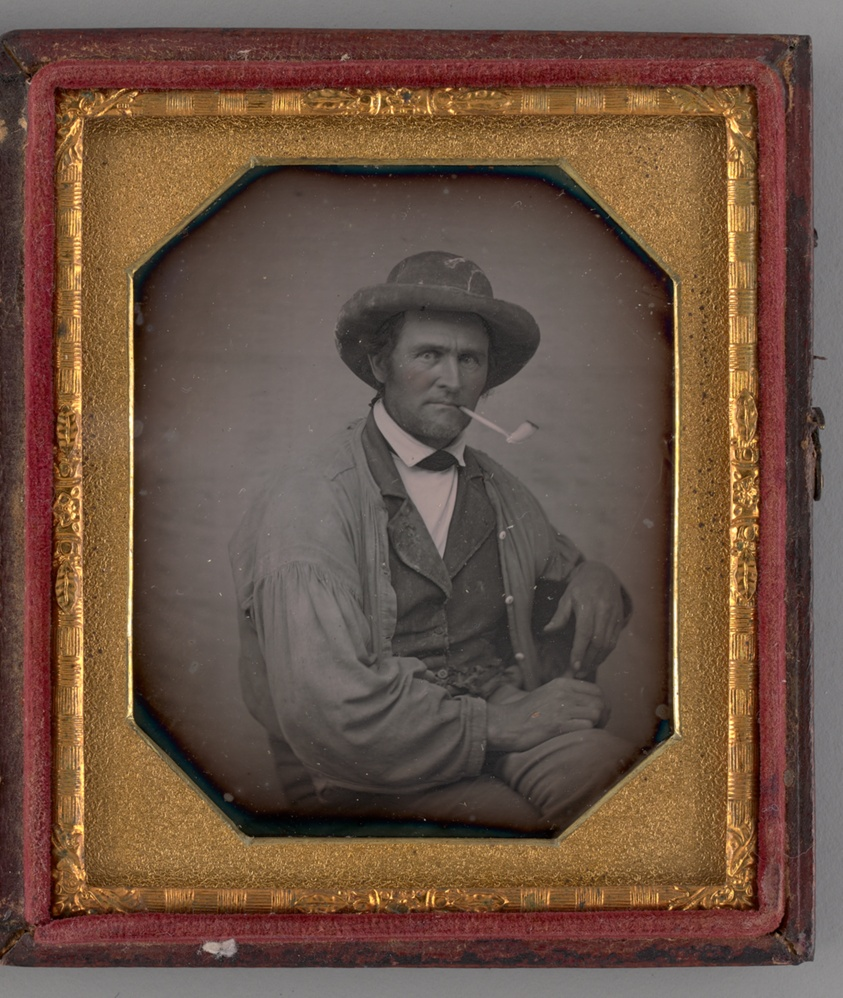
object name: Photograph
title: Untitled (Portrait of a Man with a Corn Pipe)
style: 19th century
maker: Charles Richard Meade (American, born English, 1826-1858) and; Henry William Mathew Meade (American, born English, 1822-1865)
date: 1855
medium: Daguerreotype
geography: United States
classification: portrait; photograph; photographic process; photography; portrait; daguerreotype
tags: lundberg collection, portrait, Male, hats, smoking, portraits, portraits: male subject